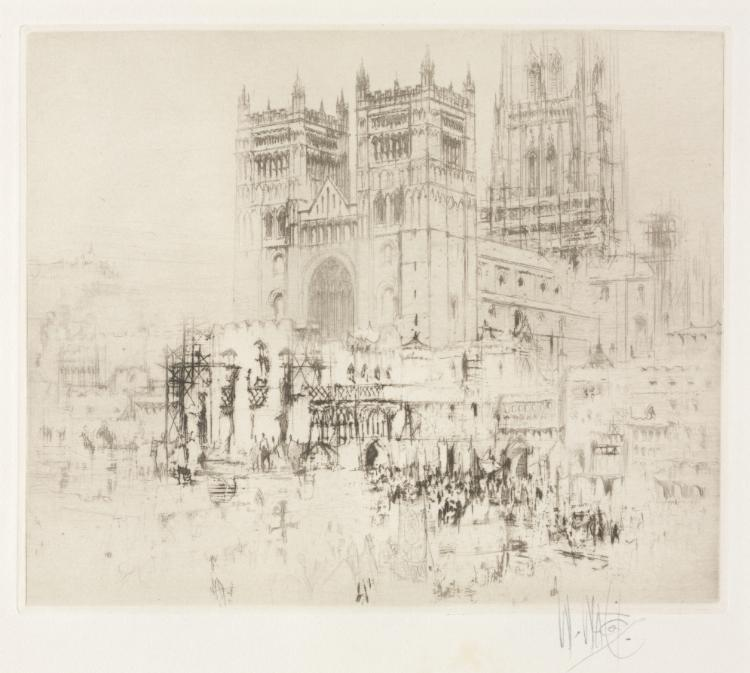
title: Durham Cathedral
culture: England, 20th century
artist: William Walcot (British, 1874–1943)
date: 1923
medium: etching and drypoint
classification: Print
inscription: Lower right margin, in pencil: "W. Walcot"